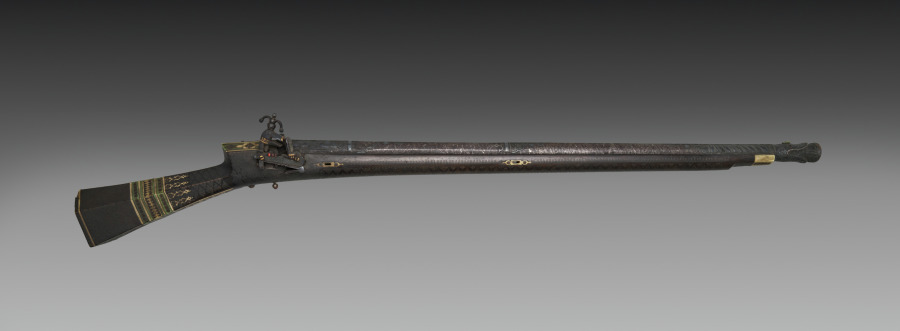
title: Gun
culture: India, Rajput Kypi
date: c. 1800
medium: iron with bone and silver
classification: Arms and Armor